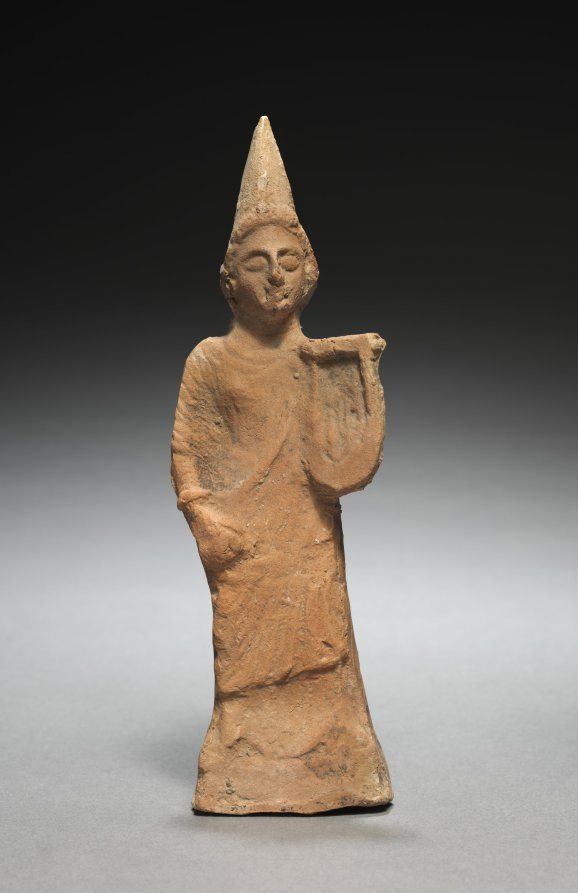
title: Draped Figure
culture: Parthian Empire (247 BCE–224 CE)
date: 1–200 CE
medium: terracotta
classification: Sculpture